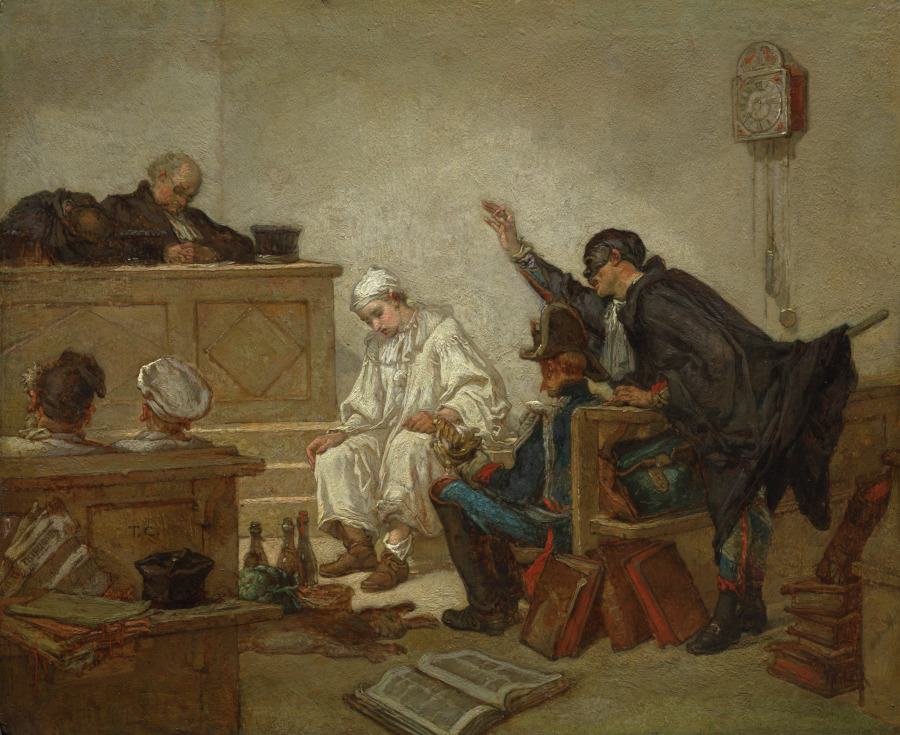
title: Pierrot in Criminal Court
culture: France, 19th century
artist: Thomas Couture (French, 1815–1879)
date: c. 1864–70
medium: oil on wood panel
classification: Painting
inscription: Signed left on the back of the bench: t.c.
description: In this painting, Couture used two famous masked characters, Pierrot and Harlequin, to satirize and critique the public and the judicial system of the 19th century. The pathetic Pierrot represents a lower-class fool on trial for stealing food from a restaurant. The stolen items are depicted lying on the courtroom floor as an indictment of his guilt. His accusers sit on the left, while Harlequin, his lawyer, argues theatrically for the defense. The artist's contempt for the legal profession and the court system is plain in the figures of the sleeping judges. A mid-19th-century observer may have sympathized with Pierrot, who for his own survival cunningly subverts authority in order to satisfy his needs.